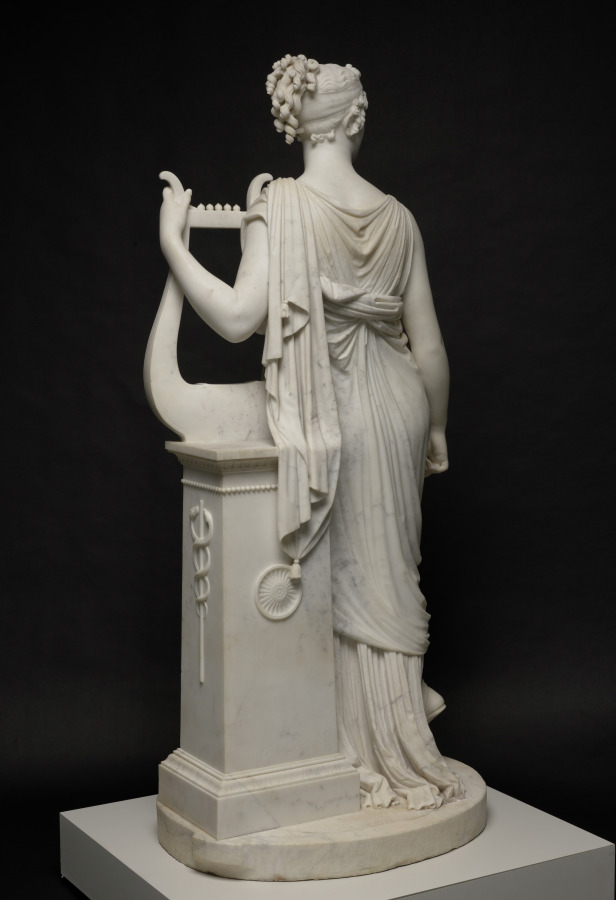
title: Terpsichore Lyran (Muse of Lyric Poetry)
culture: Italy, 19th century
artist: Antonio Canova (Italian, 1757–1822)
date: 1816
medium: marble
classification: Sculpture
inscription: inscribed on front of column: "Terpsichore Lyran" [Terpsichore as the Muse of lyric poetry]; inscribed at base of column: "Canova Fact: 1816"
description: In Greek mythology, Terpsichore was one of the nine Muses, or goddesses of creative inspiration. The lyre, the Greek inscription on the short column, and the caduceus (entwined snakes) on the side identify the figure as Terpsichore Lyran, muse of lyric poetry. This sculpture began with a commission from Napoleon's brother, Lucien, for an idealized portrait of his wife, Alexandrine. Antonio Canova made this version for a British aristocrat and exhibited it in 1817 at the Royal Academy in London to great acclaim.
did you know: Trained by his grandfather, an Italian stonemason, Canova began modeling clay and carving marble sculptures before age ten.